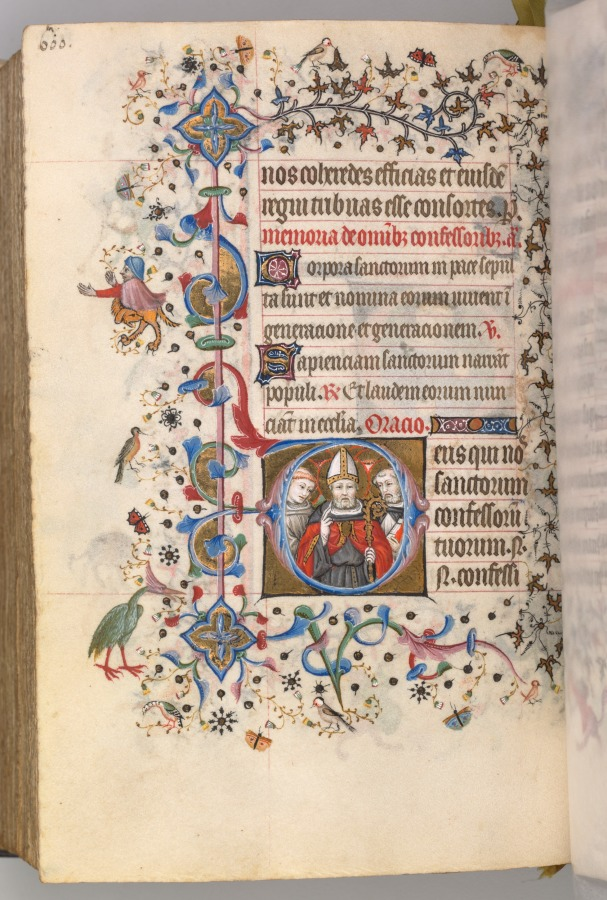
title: Hours of Charles the Noble, King of Navarre (1361-1425): fol. 294v, The Confessors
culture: France, Paris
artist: Master of the Brussels Initials and Associates (French)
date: c. 1405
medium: ink, tempera, and gold on vellum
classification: Bound Volume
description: This precious volume was obviously highly prized by its owner, the French-born King of Navarre, who had his coat of arms painted on no less than twenty folios. Rather than directly commissioning this manuscript from a specific workshop, it seems that Charles the Noble acquired his book of hours -- perhaps ready-made for the luxury market -- while on a trip to Paris in 1404-05. A collaborative effort, six painting styles are evidenced within the pages of this codex, those of two Italians, two Frenchmen, and two Netherlanders. The painter who was responsible for the planning and decoration of the book, and who produced seventeen of the large miniatures, was a Bolognese artist known as the Master of the Brussels Initials. His principal assistant, responsible for most of the borders, was a Florentine who signed his name "Zecho" da Firenze on folio 208 verso.